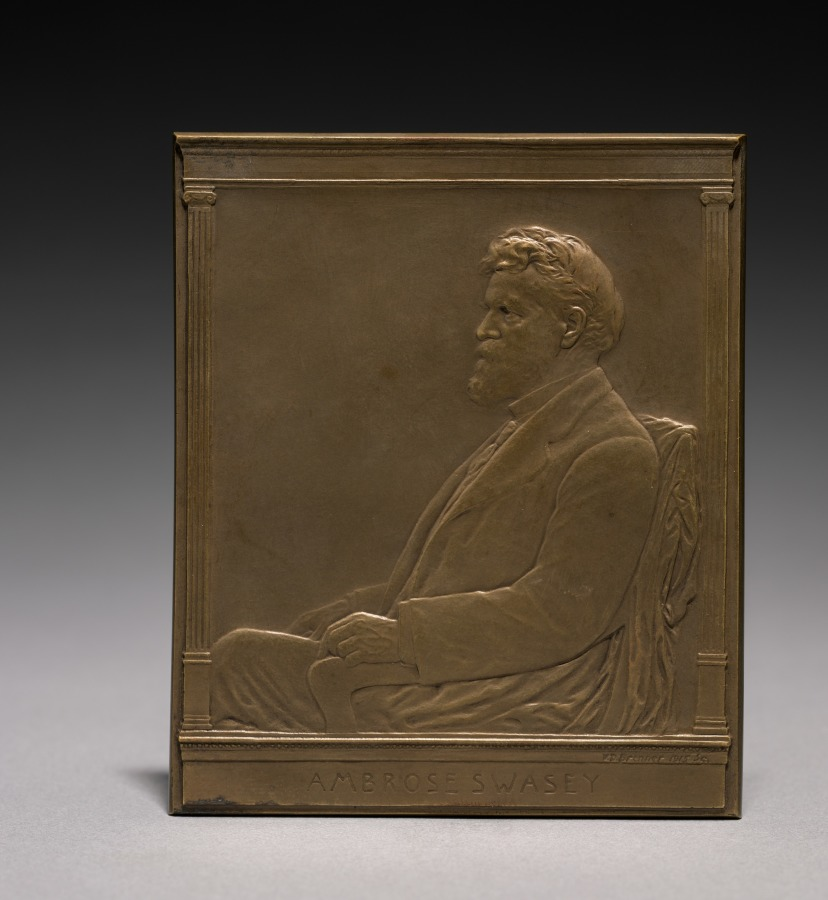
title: Medal Portrait of Ambrose Swasey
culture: America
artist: Victor D. Brenner (American, 1871–1924)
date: 1915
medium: bronze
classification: Metalwork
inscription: engraved on the lower edge: V. D. Brenner, 1915, Sc. No. 91.